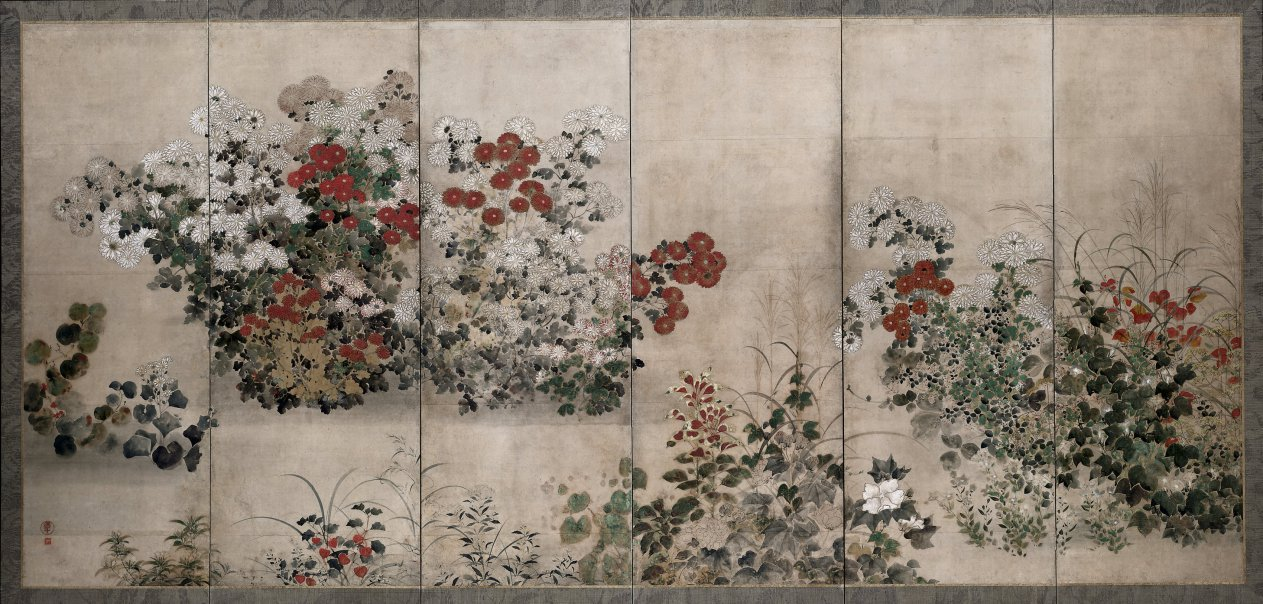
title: Flowers and Grasses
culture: Japan, Edo period (1615–1868)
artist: Kitagawa Sōsetsu (Japanese, active 1639–50)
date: mid-1600s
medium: pair of six-fold screens, ink and color on paper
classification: Painting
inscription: two seals, lower left: "I-nen; Sosetsu"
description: Kitagawa Sōsetsu painted for the Maeda family, powerful rulers of what is present-day Ishikawa Prefecture on the central northern coast of Honshū, Japan’s main island. Screens served as room dividers and backdrops in Maeda grand residences. This composition is considered one of the artist’s masterpieces. Kitagawa Sōsetsu is thought to have been a student of Tawaraya Sōsetsu, who was in turn the student of Tawaraya Sōtatsu, the Kyoto-based master painter regarded as the creator of the style that came to be known as Rinpa. By selecting a painter of this lineage, the Maeda family consciously connected their aesthetics to those of the imperial capital as a means of proclaiming their elevated status.